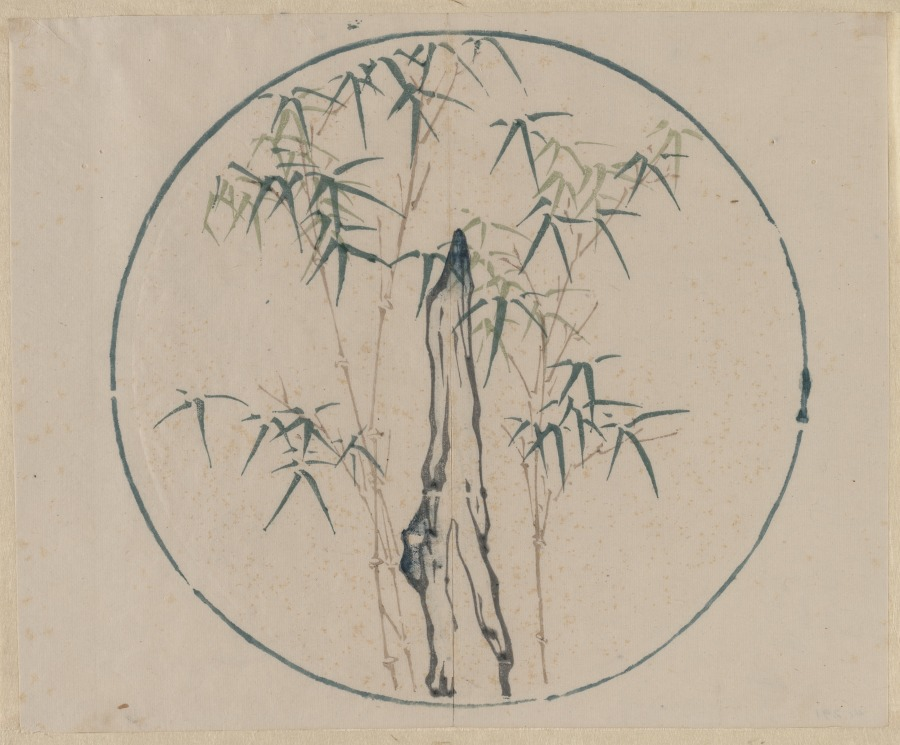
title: Bamboo and Rock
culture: China, Ming dynasty (1368-1644) or later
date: 1368–1644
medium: color woodblock print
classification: Print